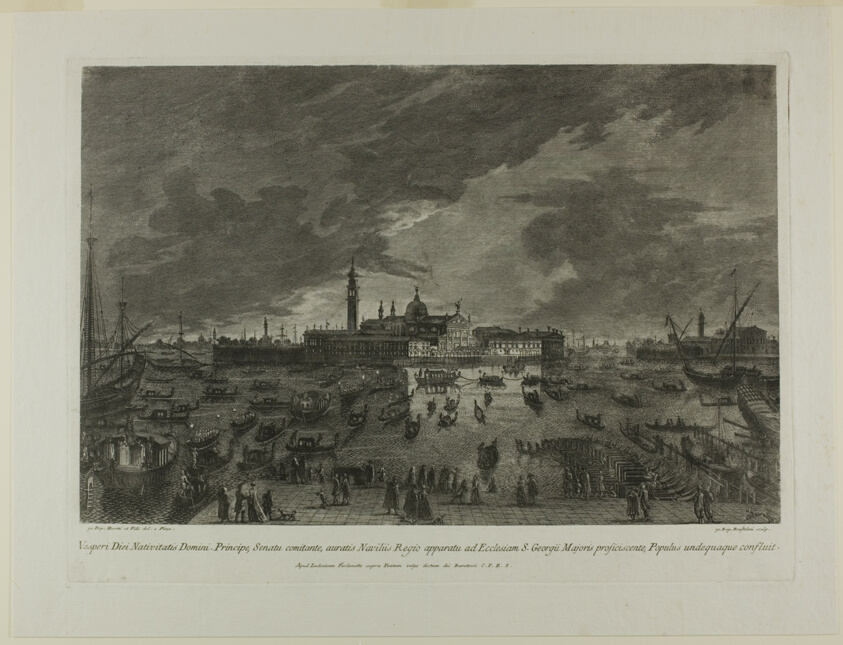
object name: Print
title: San Giorgio Maggiore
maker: Giovanni Battista Brustolini; Italian, 1712-1796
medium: Etching and engraving on paper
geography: Italy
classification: etching; print; prints and drawing